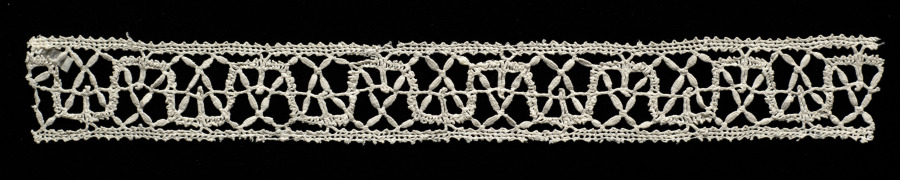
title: Lace Insertion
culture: Italy, Genoa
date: 1600s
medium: Bobbin lace (needle lace design)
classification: Lace